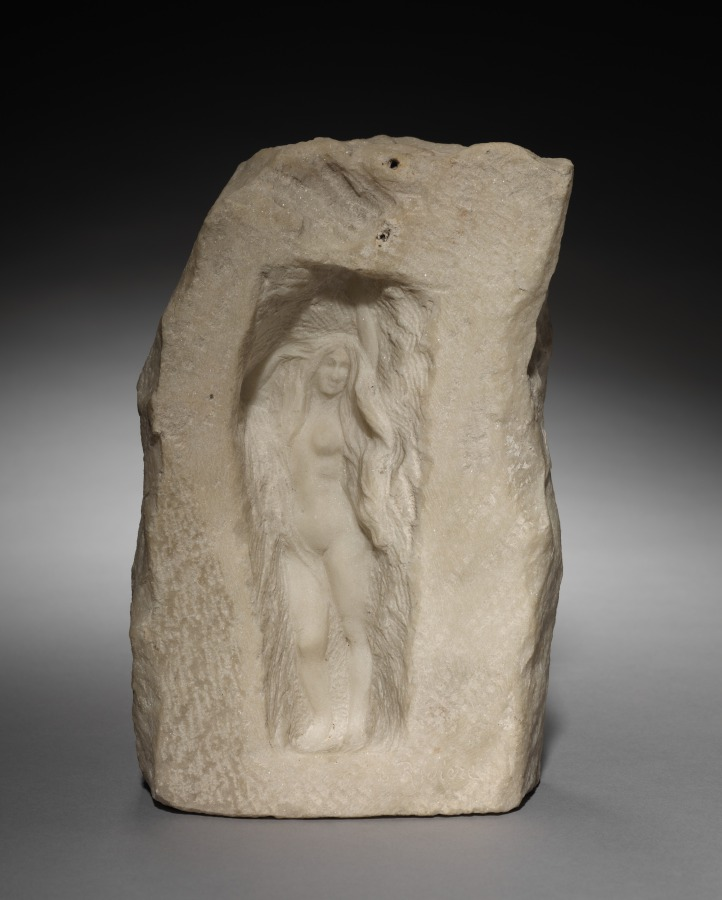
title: Nude Figure in a Niche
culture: France, late 19th-early 20th century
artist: Théodore Rivière (French, 1857–1912)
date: c. 1870 – 1912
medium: white marble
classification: Sculpture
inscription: Signed lower right: "T. Rivière"